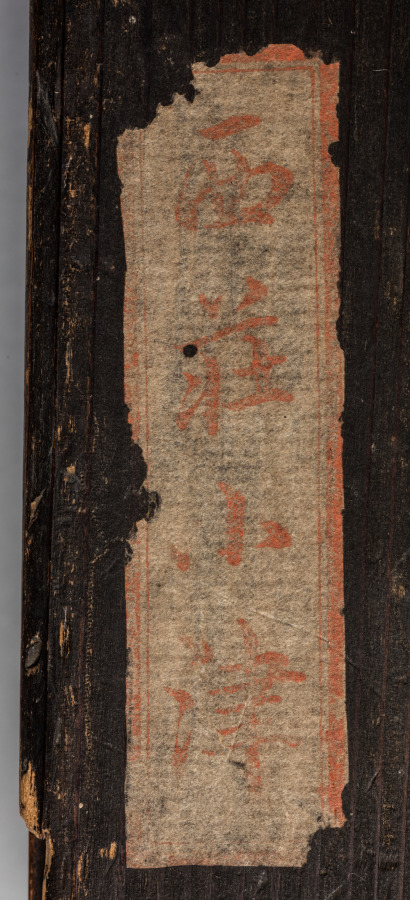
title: Landscape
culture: Japan, Muromachi period (1392–1573)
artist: attributed to Kenkō Shōkei (Japanese, active 1478–1506)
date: late 1400s–early 1500s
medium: hanging scroll, ink and light color on paper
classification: Painting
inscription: inscription above signed Shō'u Kojin; calligraphy by the Shokōji priest Tōgan Zuisen 桃源瑞仙 (1430–89)